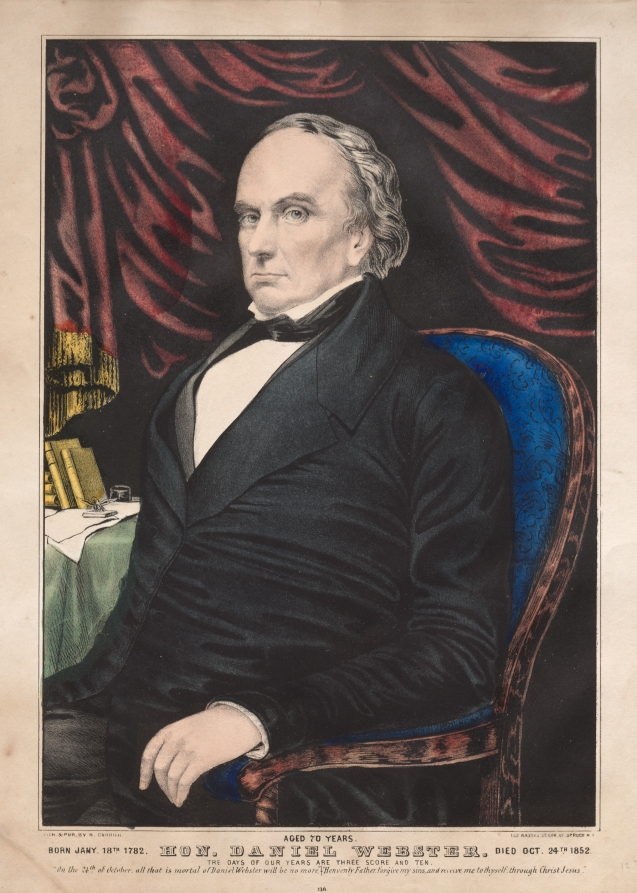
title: Hon. Daniel Webster, Aged 70 Years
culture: America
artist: and James Merritt Ives (American, 1824–1895)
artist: Nathaniel Currier (American, 1813–1888)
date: c. 1872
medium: lithograph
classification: Print